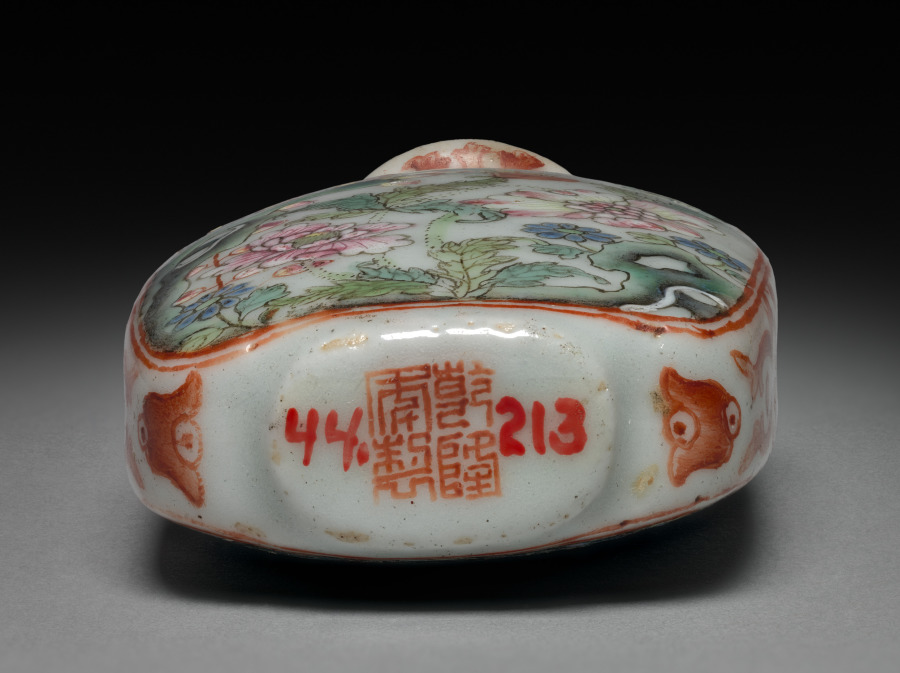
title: Snuff Bottle with Stopper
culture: China, Qing dynasty (1644–1911), Qianlong reign (1736–95)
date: 1736–95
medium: porcelain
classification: Ceramic